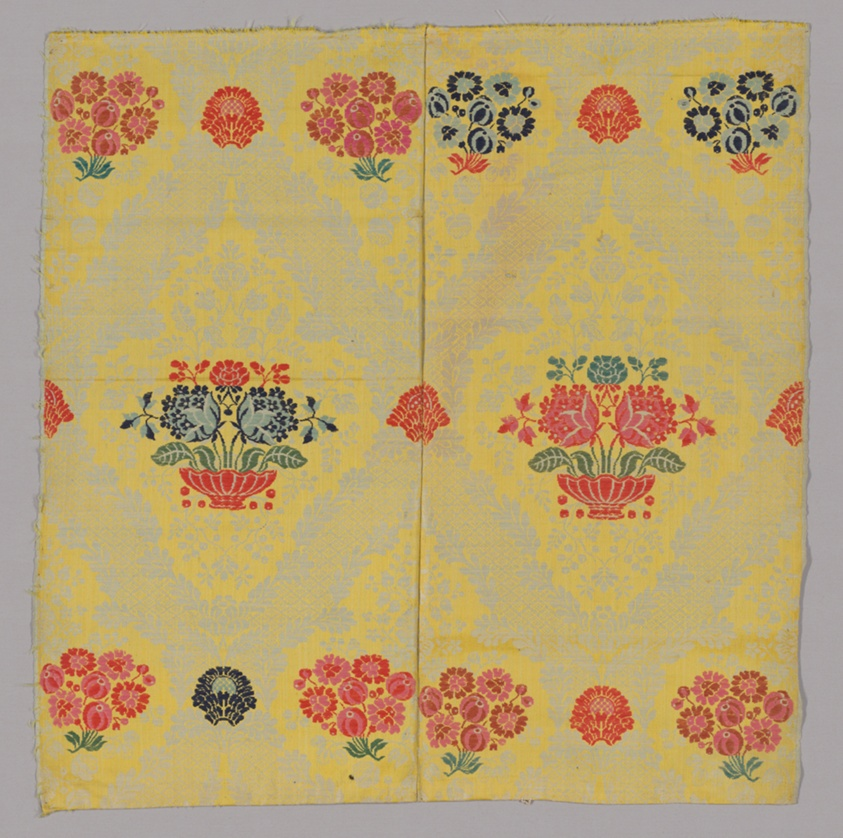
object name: Textile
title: Two Joined Panels of Brocaded Yellow Furnishing Wool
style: 18th Century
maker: England, Probably Norwich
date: c. 1720s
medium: Wool, worsted, damask weave; brocaded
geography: England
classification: weaving; textile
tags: flowers, foliage, fruit, baskets